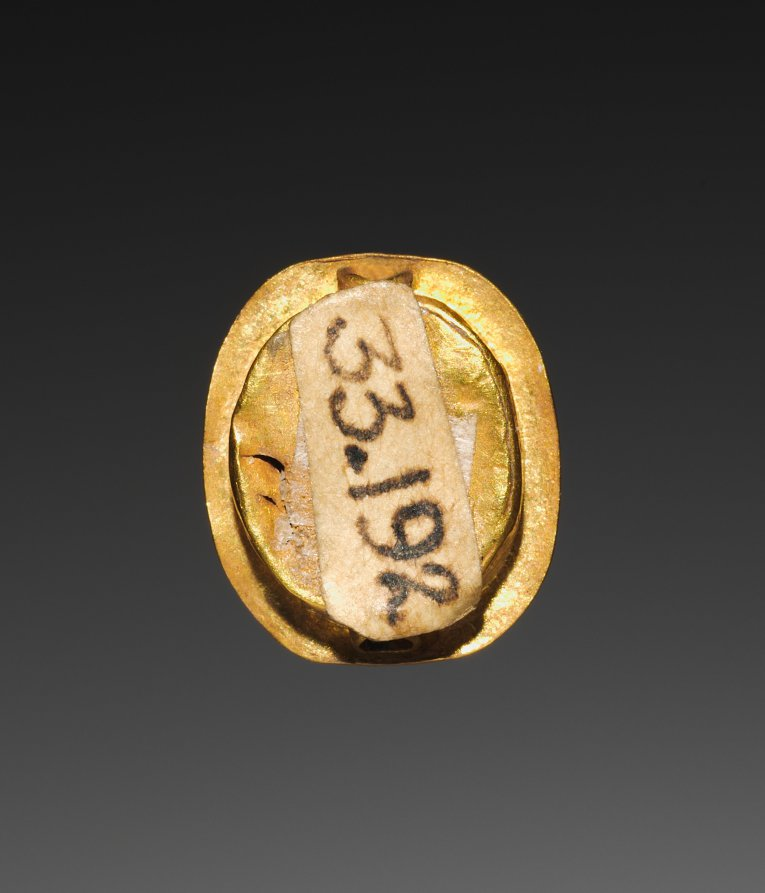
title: Garnet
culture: Parthian Empire (247 BCE–224 CE)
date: 1–200 CE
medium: gold and garnet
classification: Jewelry